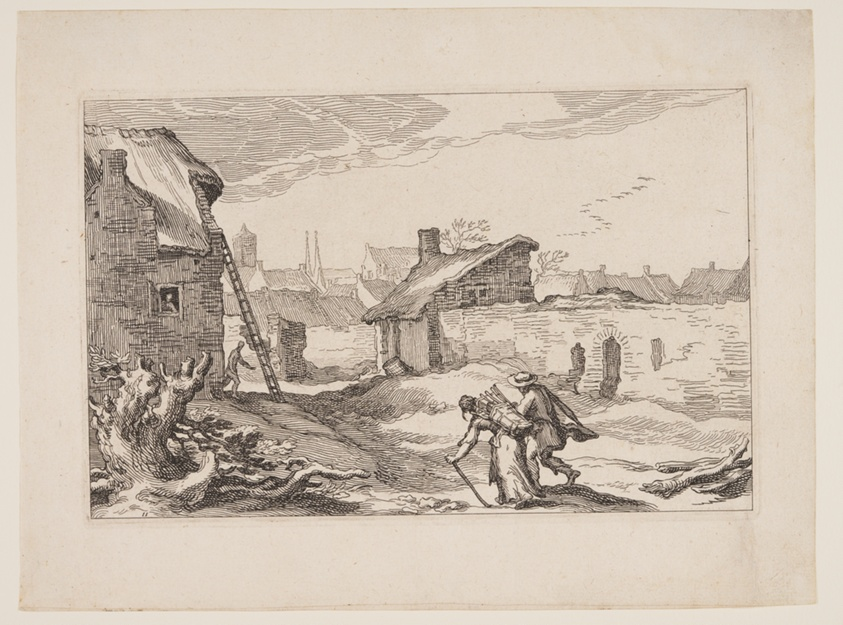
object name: Print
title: Plate 11, from Landscapes with Farmhouses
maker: Boëtius Adamsz. Bolswert (Flemish, 1580–1633); after Abraham Bloemaert (Dutch, 1566–1651)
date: 1614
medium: Etching on ivory laid paper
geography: Flanders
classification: print; paper; prints and drawing; etching